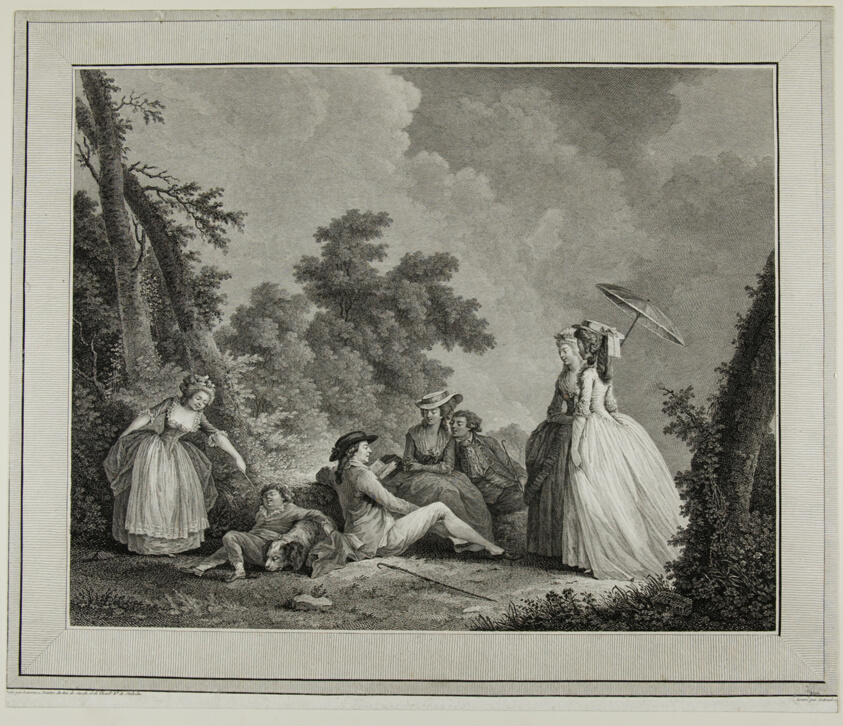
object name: Print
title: Le mercure de France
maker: Heinrich Guttenberg (German, 1749-1818); after Nicolas Lavreince (Swedish, 1737-1807)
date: c. 1780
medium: Engraving on paper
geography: Germany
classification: engraving; print; prints and drawing